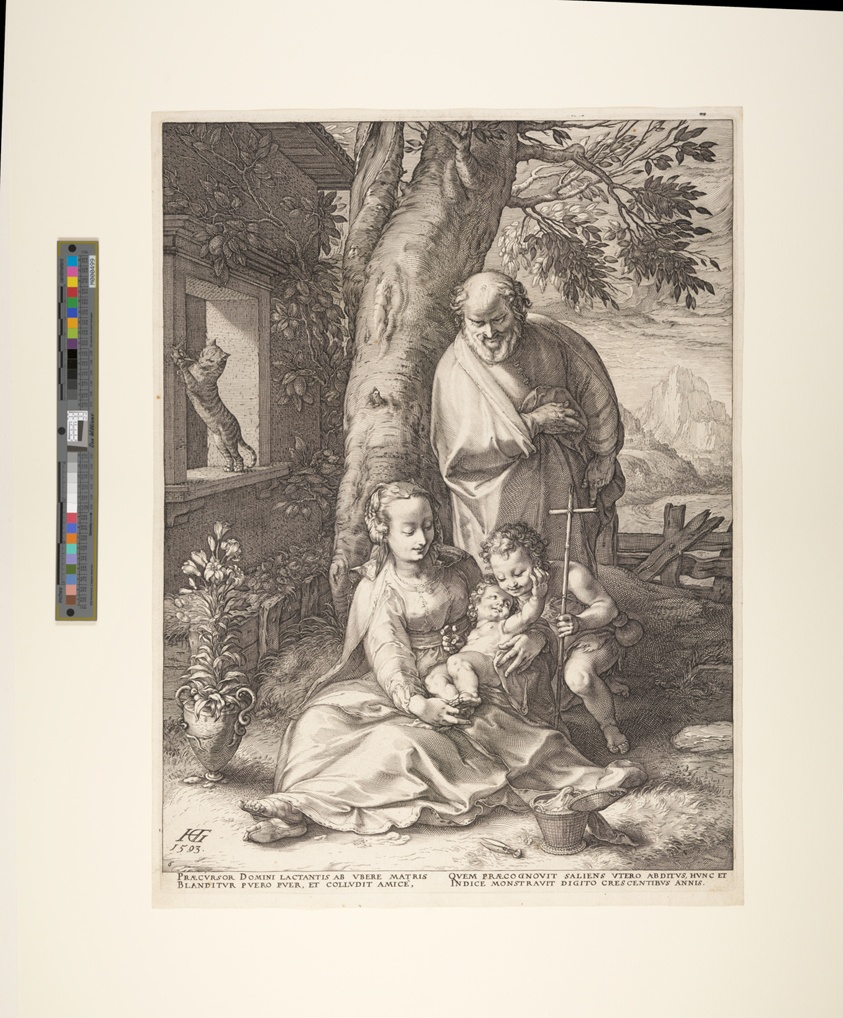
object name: Print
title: The Holy Family with the Infant John the Baptist, from The Birth and Early Life of Christ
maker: Hendrick Goltzius (Dutch, 1558–1617)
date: 1593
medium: Engraving on ivory laid paper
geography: Netherlands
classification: engraving; paper; print; prints and drawing